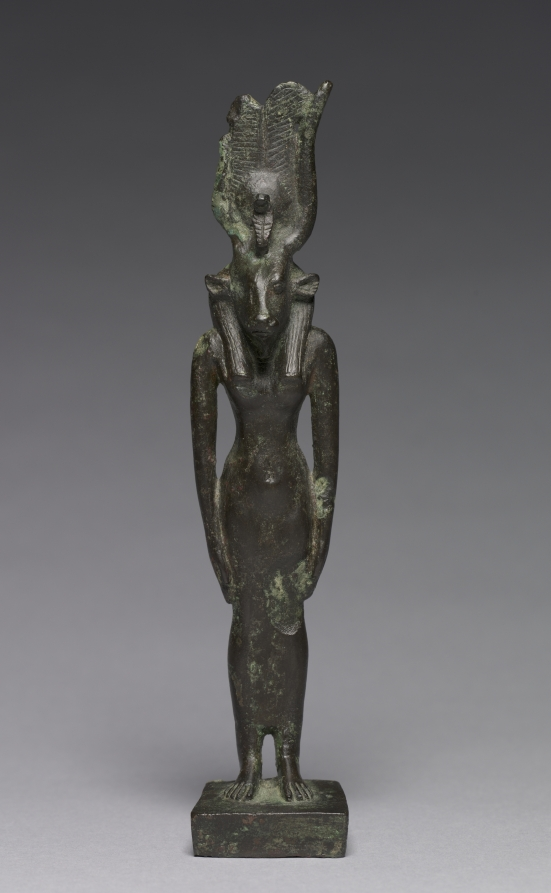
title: Statuette of Hathor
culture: Egypt, Late period (715–332 BCE), Dynasty 26 or later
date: 664–30 BCE OR 664–330 BCE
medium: bronze, solid cast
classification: Sculpture